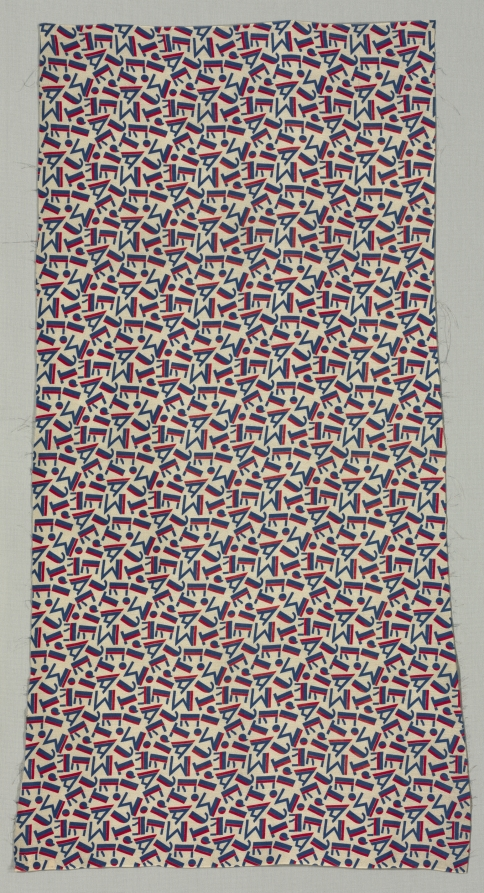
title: Je T'aime (No. 632)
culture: America, New York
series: Americana Prints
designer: Kneeland (Ruzzie) Green (American 1892–1956)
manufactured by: Stehli Silks Corporation (United States; Pennsylvania, Lancaster; and New York, New York, 1840–c. 1955)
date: 1927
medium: Silk crepe: plain weave, roller printed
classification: Textile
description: This roller printed design in red and blue on a white ground features an abstract design of the words Je T’aime (I Love You). Designed in 1927, it was part of the Stehli Silks Corporation’s Americana Prints series.